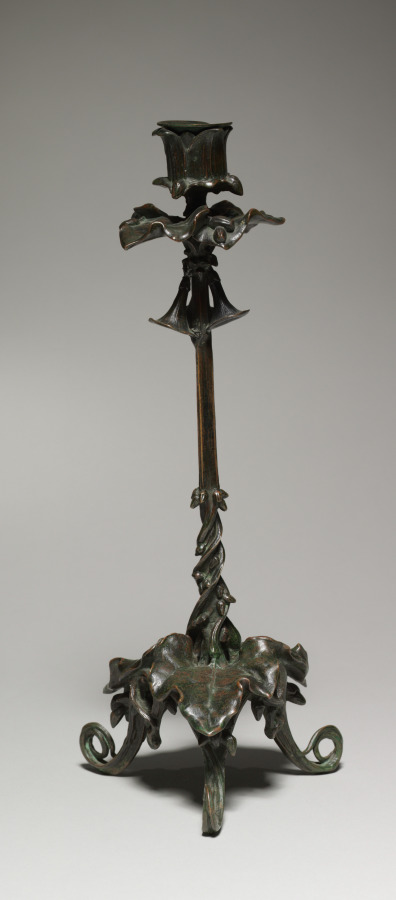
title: Candlestick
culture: France, 19th century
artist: Antoine-Louis Barye (French, 1796–1875)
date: 1800s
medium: bronze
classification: Furniture and woodwork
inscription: signed on underside of one of ivy leaves on base: "BARYE."